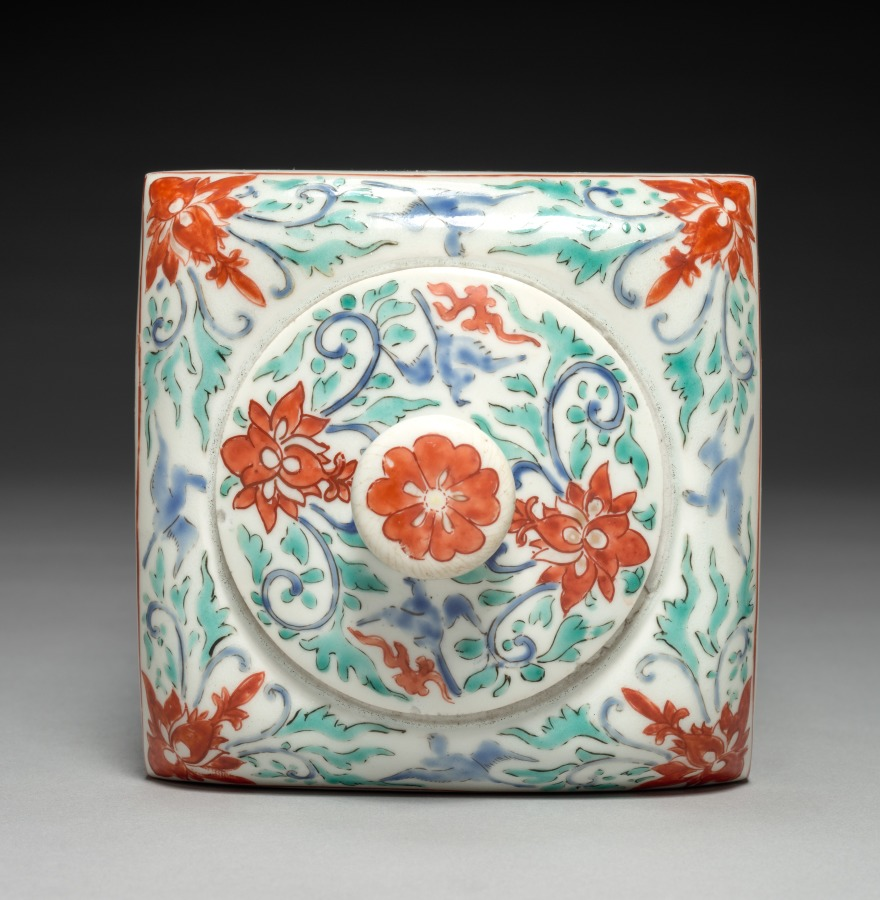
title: Square Jar with Birds and Flowers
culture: Japan, Edo period (1615–1868)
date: late 1600s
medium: Porcelain with overglaze color enamels and gold (Hizen ware, Kakiemon type)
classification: Ceramic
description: This lidded square jar was likely paired with a complementary yet nonidentical mate. The pine tree, plum, and bamboo together form the frequently depicted motif known as the Three Friends of Winter (shōchikubai), so named because of their hardy perseverance in the cold. Each side also features a pair of birds, including cranes on one face and pheasants on another.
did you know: A jar like this was fired at a high temperature, painted with colored enamels, and then fired again at a lower temperature.